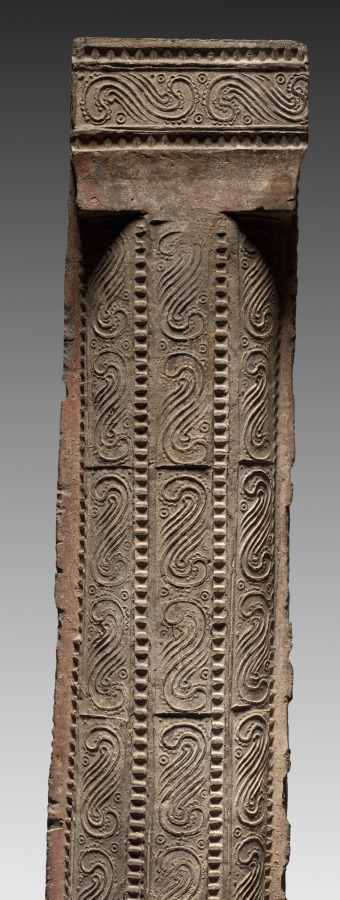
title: Hollow Tile: Column from Tomb-Chamber Doorway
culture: China, Han dynasty (202 BCE–220 CE)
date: 100–200 CE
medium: earthenware, die-stamped relief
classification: Ceramic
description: Striding tigers (top), racing horsemen (right column), and reverent officials (left column) are stamped into the surface of this underground portal to a tomb. The doorway preserves in stone the post-and-lintel structure, a basic element of Chinese wooden architecture. By the first century AD, a revolution in Chinese tomb construction and furnishing had taken place. Tombs lined with decorated bricks and tiles replace the earlier tombs constructed with only rammed earth-walls. Ceramic surrogates or models of stoves, houses, servants, and pets filled these more durable chambers, symbolically extending the creature comforts of this world into the world after death.